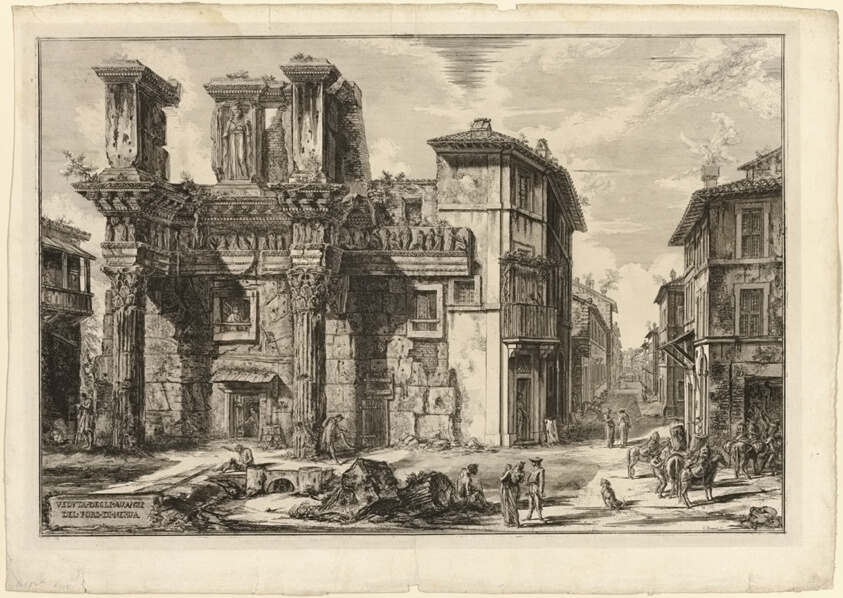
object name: Print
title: View of the Remains of the Forum of Nerva, from Views of Rome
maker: Giovanni Battista Piranesi (Italian, 1720-1778)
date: 1770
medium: Etching on heavy ivory laid paper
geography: Italy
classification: etching; print; prints and drawing